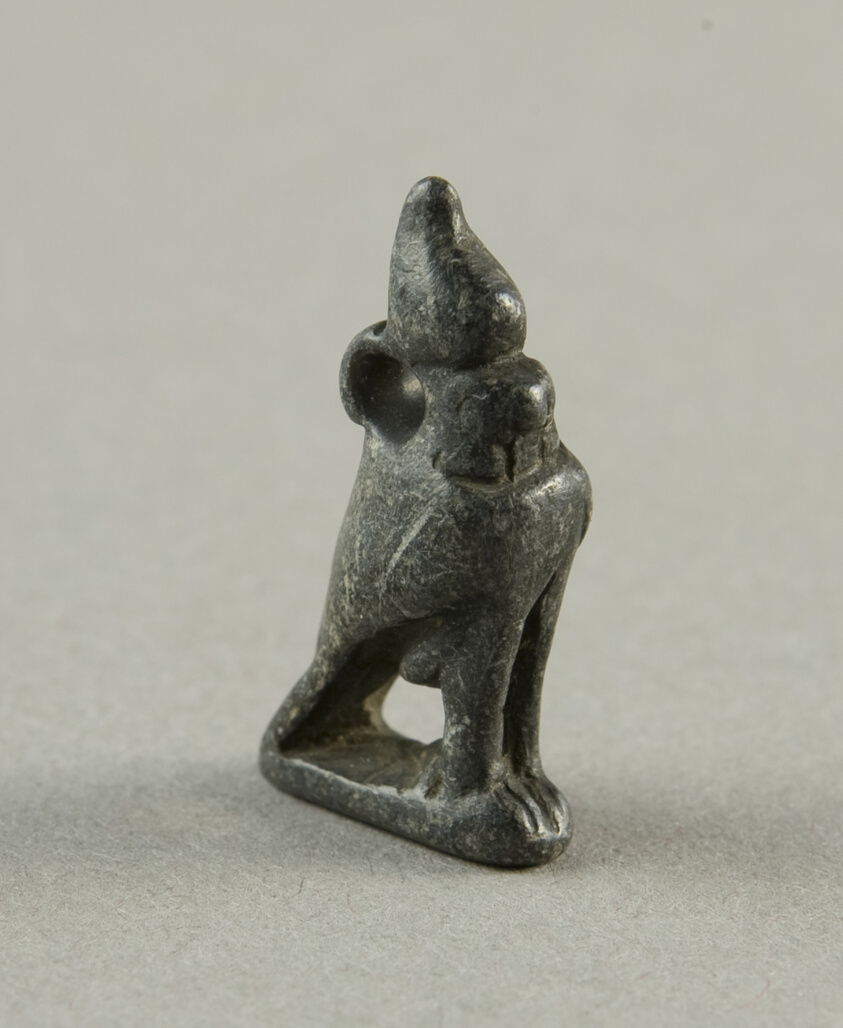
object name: Costume and Accessories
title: Amulet of the God Horus as a Falcon with Double Crown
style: egyptian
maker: Egyptian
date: Late Period, Dynasty 26–31 (664–332 BCE)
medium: Steatite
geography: Egypt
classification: amulet; jewelry; stone; ancient art; costume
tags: gods (deities)